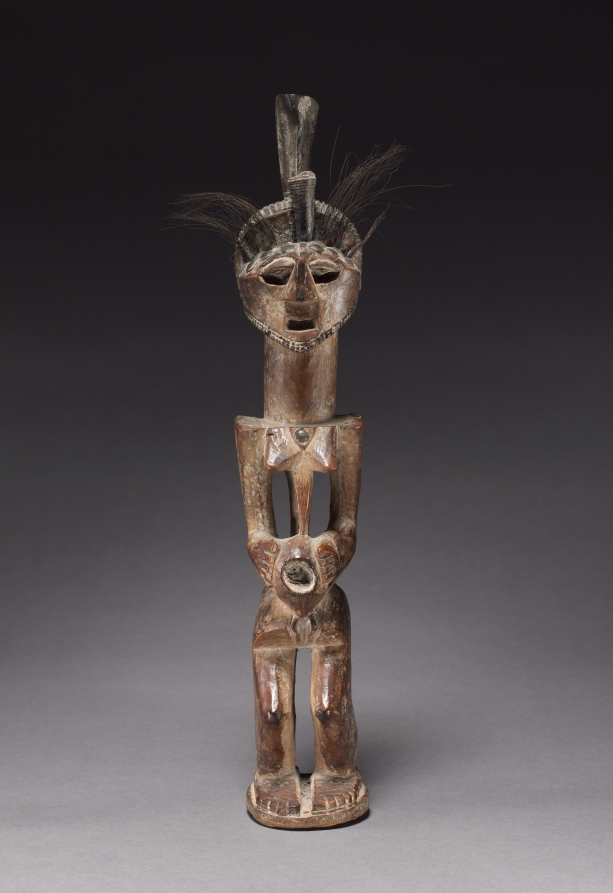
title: Female Figure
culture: Africa, Democratic Republic of the Congo, Songye people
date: late 1800s-early 1900s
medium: Wood, upholstery studs, antelope horns, and animal hair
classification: Sculpture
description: Mankishi figures were believed to have magical powers and were used by diviners to contact spirits in otherworldly realms. Smaller, personal power figures were used to connect with “common” ancestors, while the larger Mankishi figures contacted higher-ranking ancestral spirits. These power figures were kept in their own personal spaces because of their powerful status, and could only be handled by their designated nkunja, or guardian.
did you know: Because this Mankishi is neither small or quite large in size, it was most likely used by a family rather than an individual.